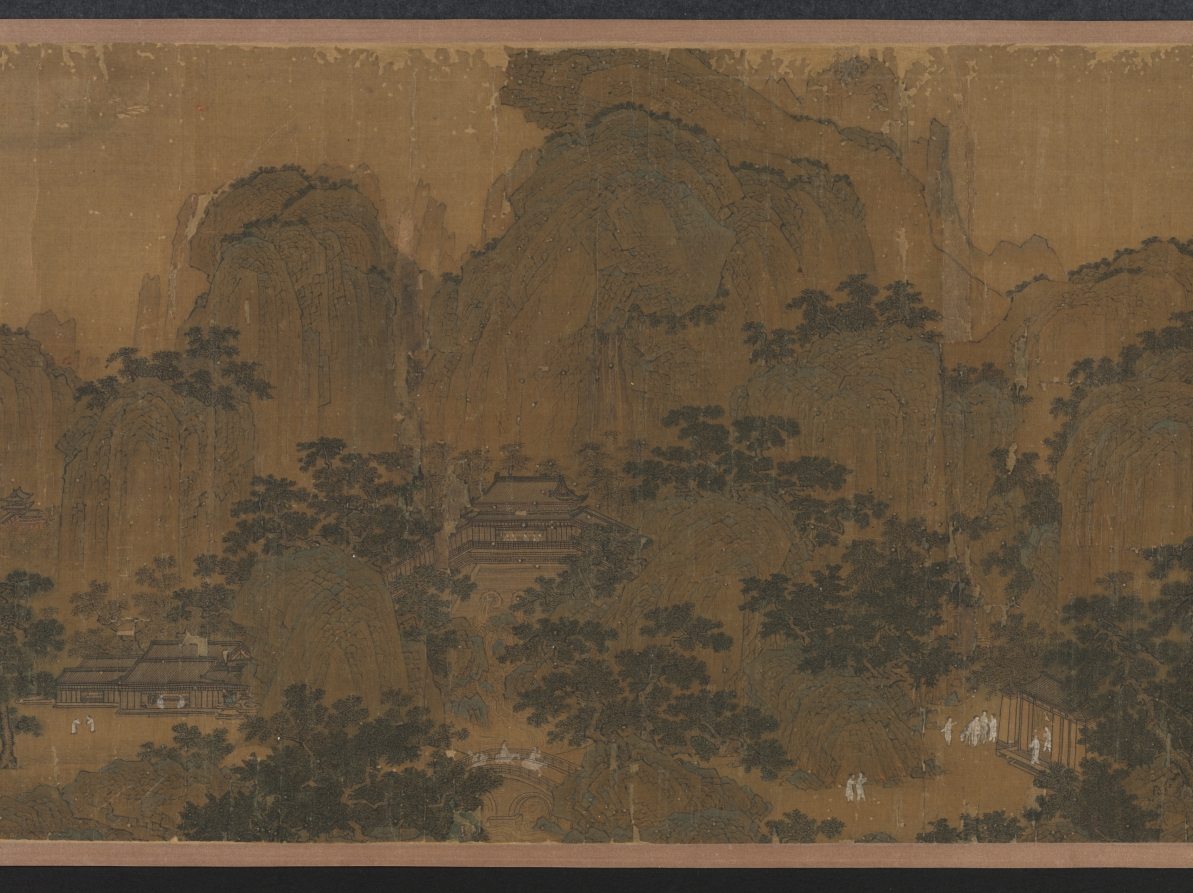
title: Waiting for the Moon in the Mid Autumn Festival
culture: China, Ming dynasty (1368–1644)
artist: Shi Rui (Chinese, c. 1400-c. 1470)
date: 1400s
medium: handscroll, ink, color, and gold on silk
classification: Painting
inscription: [印] 石氏以明; 游戯翰墨.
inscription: 僊山樓觀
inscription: 1 inscription, dated 1639, and 1 seal of Xiao Yuncong 蕭雲従 (1596-1673). Inscription by Xiao Yuncong: This is a painting by the Junior General Li. The painting is damaged and cracked at many places. Many of the paper strips for backing have been missing since long ago, but the colors are still fresh as if they had just been applied and the ink still looks moist. During the reign of Tianbao (742-756) of the Tang Dynasty, the Imperial Klansman Li Sixun was summoned to paint the walls of the Datong Hall. He was known as the "Senior General." His son, who came to be known as the "Junior General," was named Zhaodao. Of the stone epitaph [Li Sixun bei, or the "epitaph of Li Sixun," one of the best known calligraphic monuments of the Tang Dynasty], engraved with the calligraphy of Li Beihai 李北海 [Li Yong 李邕, 678-747], more than half has fallen off. Why, in contrast, was this painting able to survive? Or could it be that despite the fact that the stone is hard and the silk is soft, their preservation or destruction depends on some other factors? Moreover, since they were titled nobility of imperial descent, it is doubtful that they had the leisure and the mood to indulge in such decorative and descriptive blue and gold painting for the mere amusement of their fellow men. Recently, I read the Yi zhou ming hua lu 益州名畫錄 [by Huang Xiufu 黃休復, preface 1005]. I found a certain Li Chin-nu who compared himself with Li Zhaodao 李昭道 and was called by the Sichuan people the Junior General Li. In a painting which he did, entitled Mt. Ch'ing-ch'eng, the architectural structure of the pavilions, terraces, bridges, and boats are meticulous and accurate. The horsemen on a spring outing are as small as grain and the wild geese among the clouds as tiny as dust. It was also said that he painted on silk of any length in accordance to specific commissions. Is it possible that this painting is one of his? Since that time 700 years have passed. Yet one of the two Junior General Li's must be our painter. Formerly, there were the so-called "Four Excellents" in the Hall of Portraits of the Buddhist monk Wu-ta Kuo-shih: the [portrait] painting by Ch'ang Ts'an [act. ca. 881-888}, the calligraphy by Priest Tao-ying, the eulogy by Li Shangyin 李商隱 [813-858], and the landscape by Li Sheng [act. ca. 908-925]. This Li Sheng was styled Chin-nu and was also called Junior General Li. In the tenth month of the Chi-mao year, the twelfth year of the Chongzhen era [1639], recorded by Xiao Yuncong of Wuhu. trans. WKH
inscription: 4 colophons and 30 additional seals: 1 seal of Xu Qianxue 徐乾學 (1631-1694); 1 seal of Li Chien 黎簡 (1747-1799); 1 seal of Chang Chin-fang (18th c.); 2 seals of Sun Erzhun 孫爾準 (1770–1832); 1 colophon and 2 seals of Zhang Weiping 張維屛 (1780-1859); 1 seal of Wu Rongguang 吳榮光 (1773-1843); 1 colophon and 2 seals of Luo Tianchi 羅天池 (1826 jinshi); 7 seals of Wu Yanhui 伍元蕙 (active 1821–1851); 2 colophons and 4 seals of Pan Zhengwei 潘正煒 (1791-1850); 9 seals unidentified.